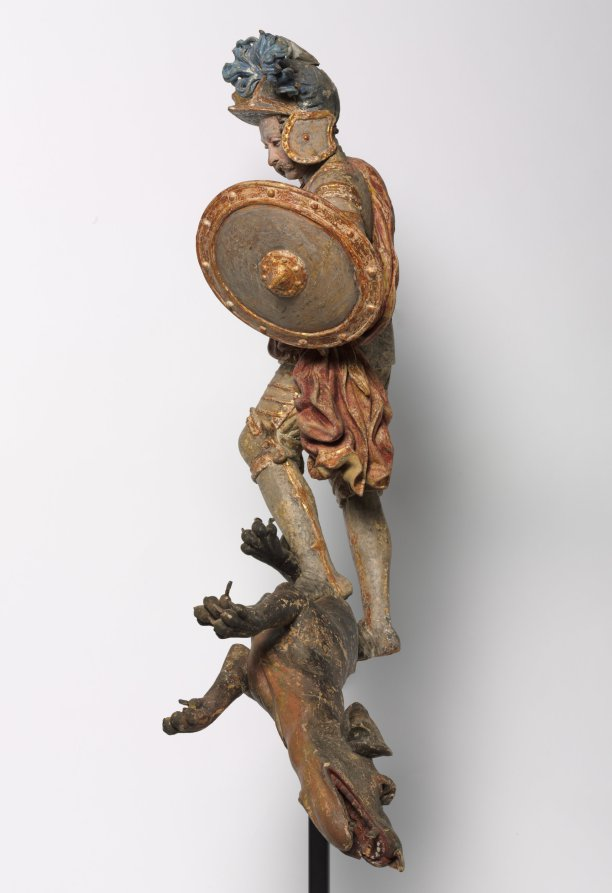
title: Saint George and the Dragon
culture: South Germany or Austria, late 17th century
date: late 1600s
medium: painted and gilded wood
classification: Sculpture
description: Saint George, a Roman soldier martyred for his Christian faith, is best known for slaying a fearsome dragon that terrorized the city of Silene, in Libya. George offered to kill the monster if residents of the city convert to Christianity. Here, George stands triumphantly over the dragon, writhing as it dies. The artist deliberately incorporated features intended to make his figure seem more familiar: the dragon seems more canine than reptilian, while George wears armor from the recent past and bears almost portrait-like facial features.